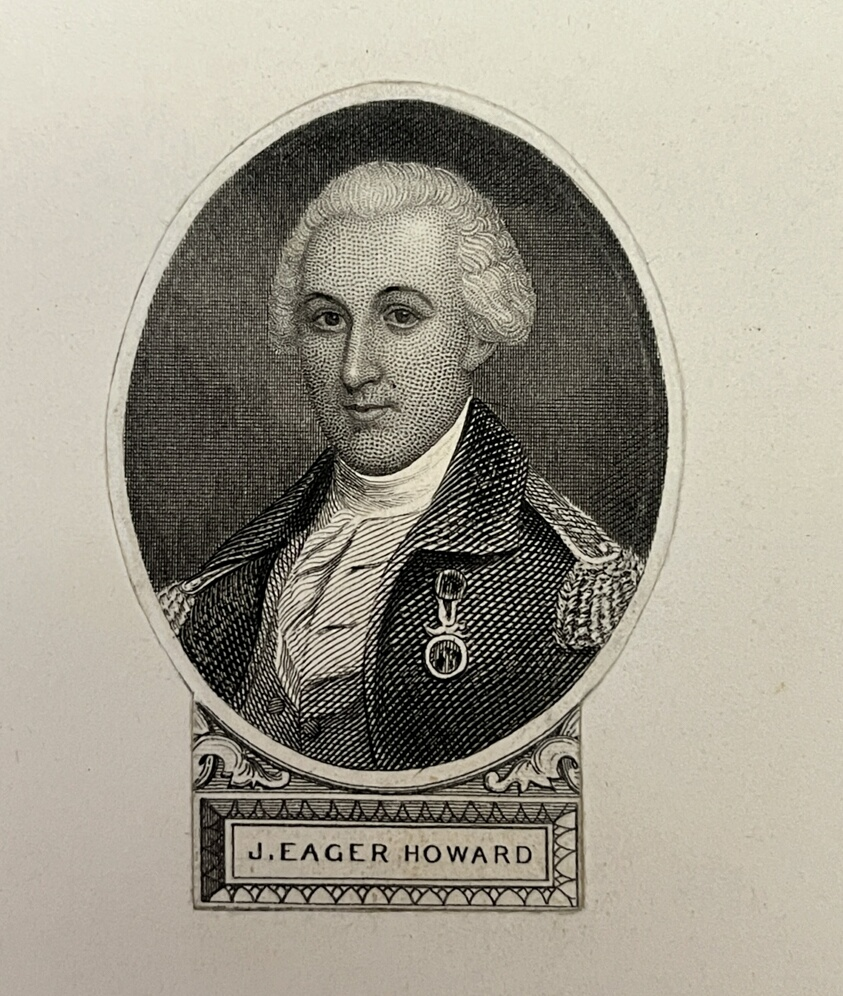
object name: Print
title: J. Eager Howard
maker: Artist Unknown (Likely American, 19th century)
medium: Etching on paper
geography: United States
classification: reproduction; print; prints and drawing